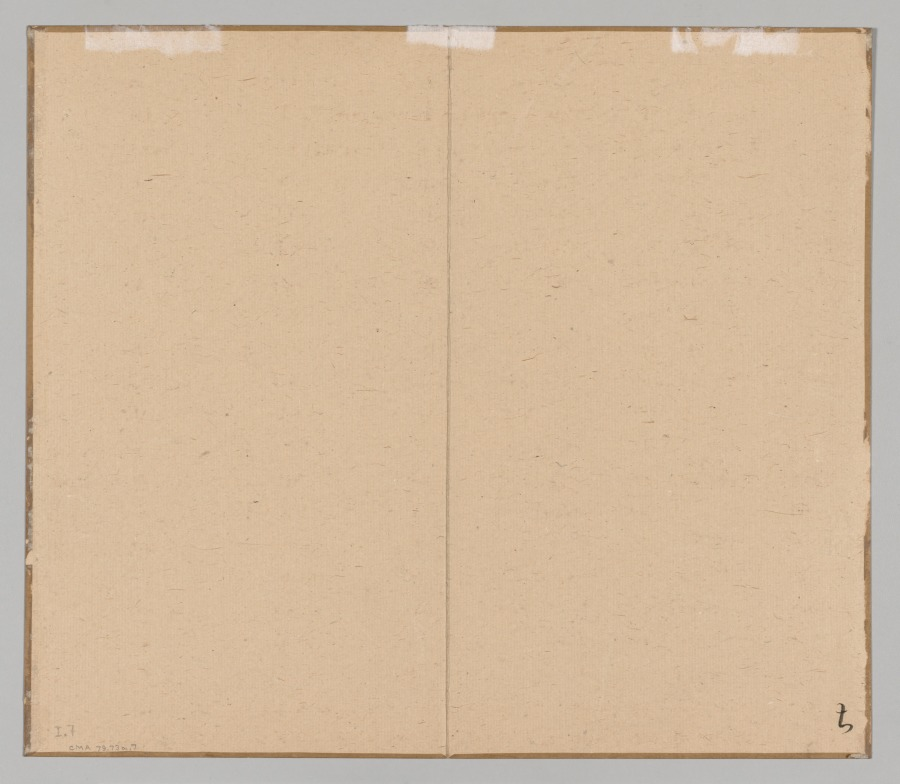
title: Reverberations of Taiga, Volume 1 (leaf 7)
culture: Japan, Edo period (1615–1868)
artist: Aoki Shukuya (Japanese, d. 1802)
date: mid- to late 1700s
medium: double-leaf from a pair of albums; ink and light color on paper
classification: Portfolio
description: Traditionally, young painters in Japan began their studies with an established master-painter. The master's compositions invariably became models that the apprentice copied to learn various ink and brush techniques. Shukuya was a pupil of the famous Kyoto artist Ikeno Taiga, whose style is reflected in these sketches of rocks, trees, and mountains.